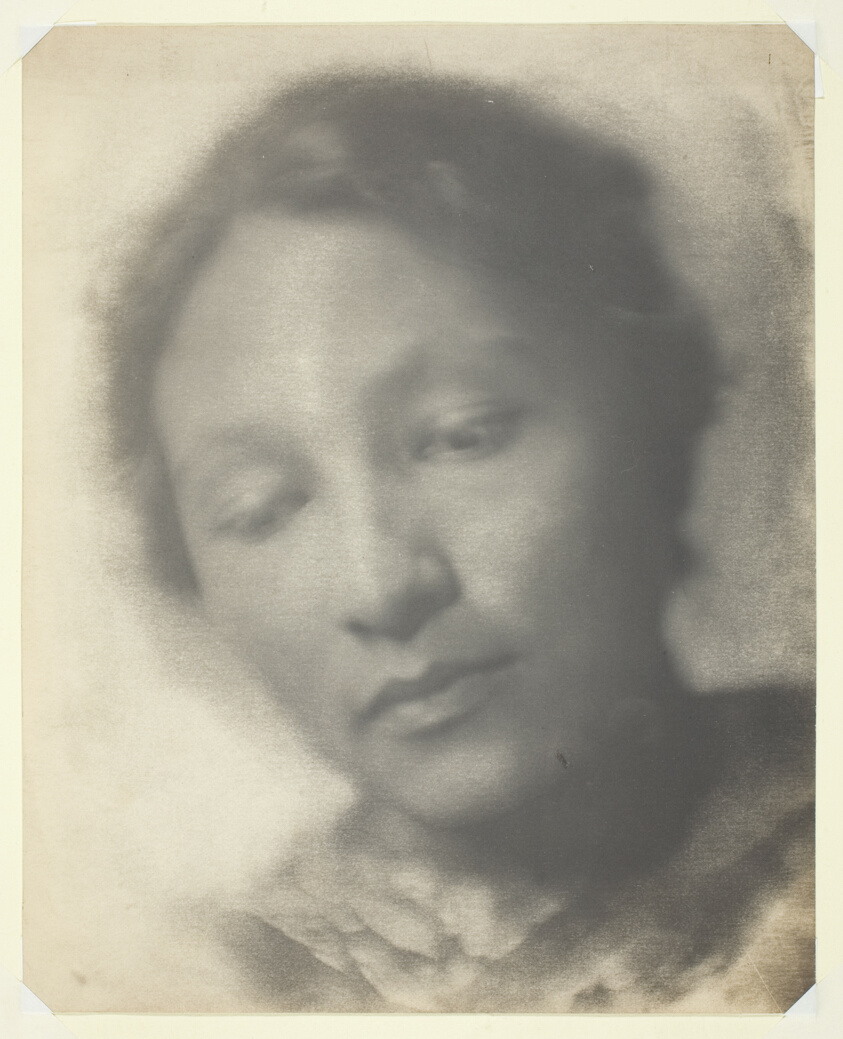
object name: Photograph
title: Asia (Zit-kala-za)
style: Pictorialism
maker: Joseph T. Keiley (American, 1869–1914)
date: c. 1900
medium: Glycerine developed platinum print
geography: United States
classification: platinum print; photographic process; photography; photograph